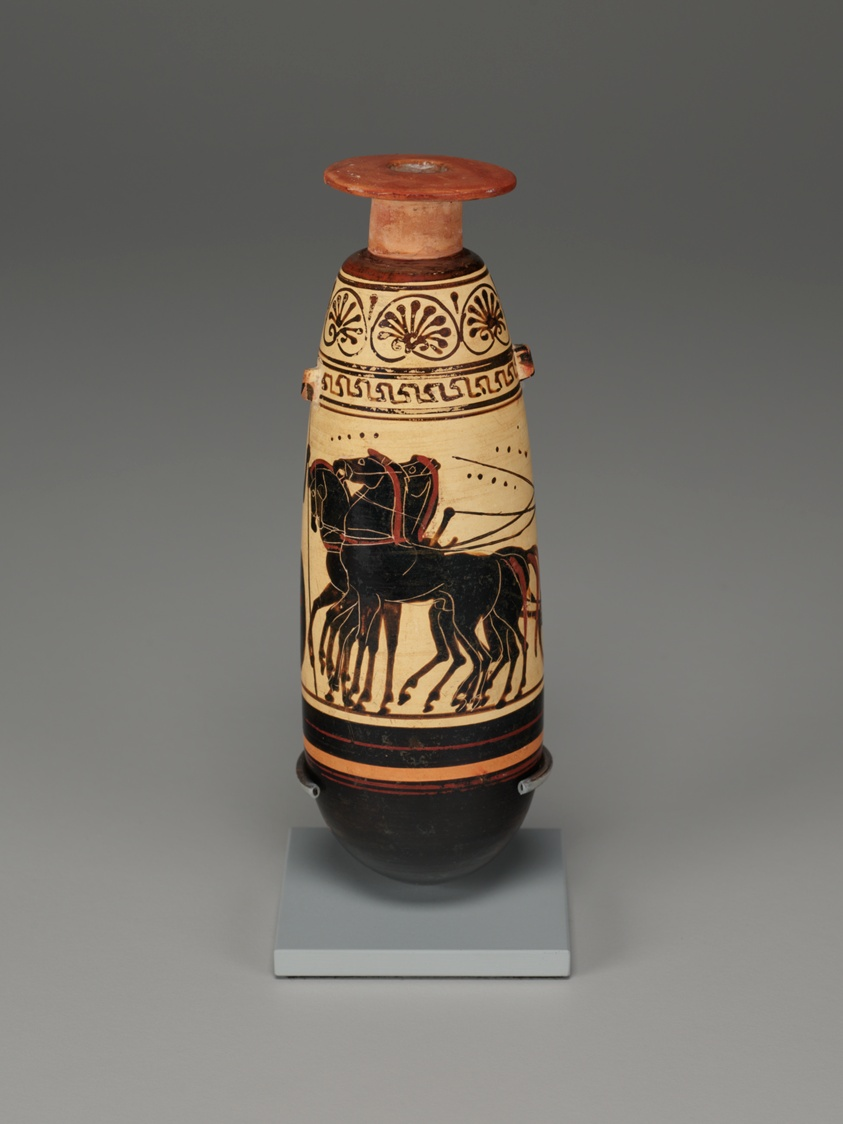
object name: Vessel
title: Alabastron (Container for Scented Oil)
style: archaic (greek), attic, ancient, greek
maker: Attributed to the Diosphos Painter; Greek; Athens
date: about 500-480 BCE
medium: terracotta, black-figure on white ground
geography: Athens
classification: vessel; ancient art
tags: mythology, beauty, rituals